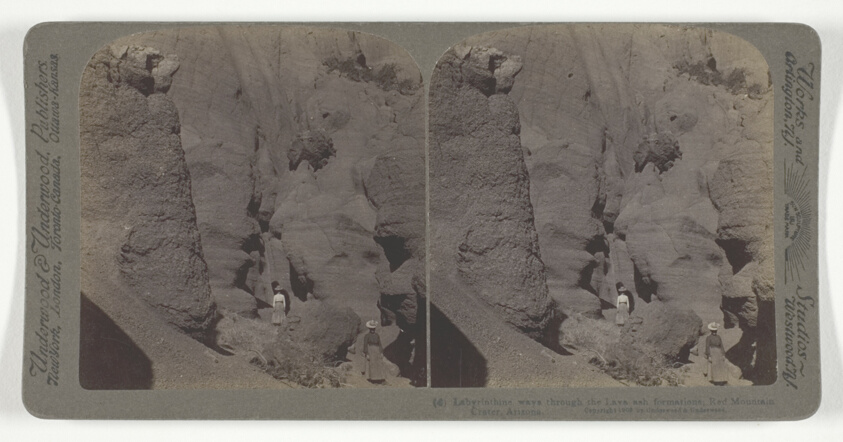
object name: Photograph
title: Labyrinthine ways through the Lava ash formations, Red Mountain Crater, Arizona, No. 6 from the series "Notes of Travel"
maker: Underwood & Underwood (American, active 1881–1920)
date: 1903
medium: Albumen print, stereo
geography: United States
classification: stereograph (albumen); albumen silver print; photographic process; photography; photograph